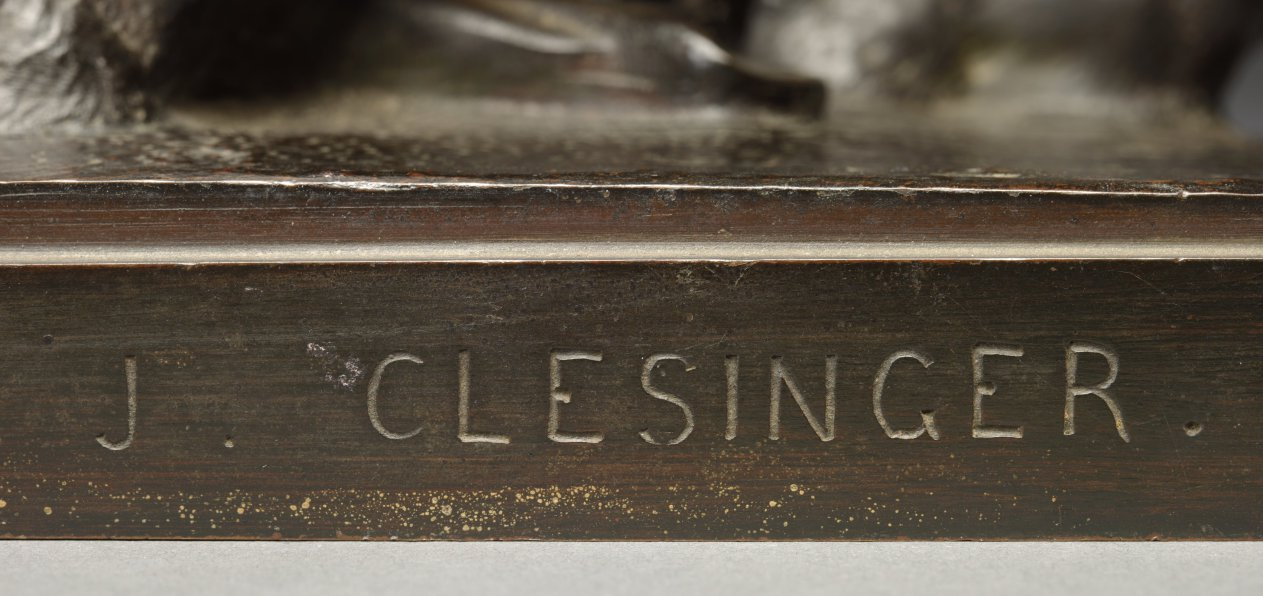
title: Ariadne on a Panther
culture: France, 19th century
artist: Jean-Baptiste Clésinger (French, 1814–1883)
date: 1873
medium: bronze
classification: Sculpture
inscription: signed on side of base: "J. CLESINGER"; inscribed around edge of stamp: "BRONZE ARTISTIQUE/DE PARIS"; on cut of neck of woman, "CAYUZ"; on edge of base: "1 Rue de la PAIX."